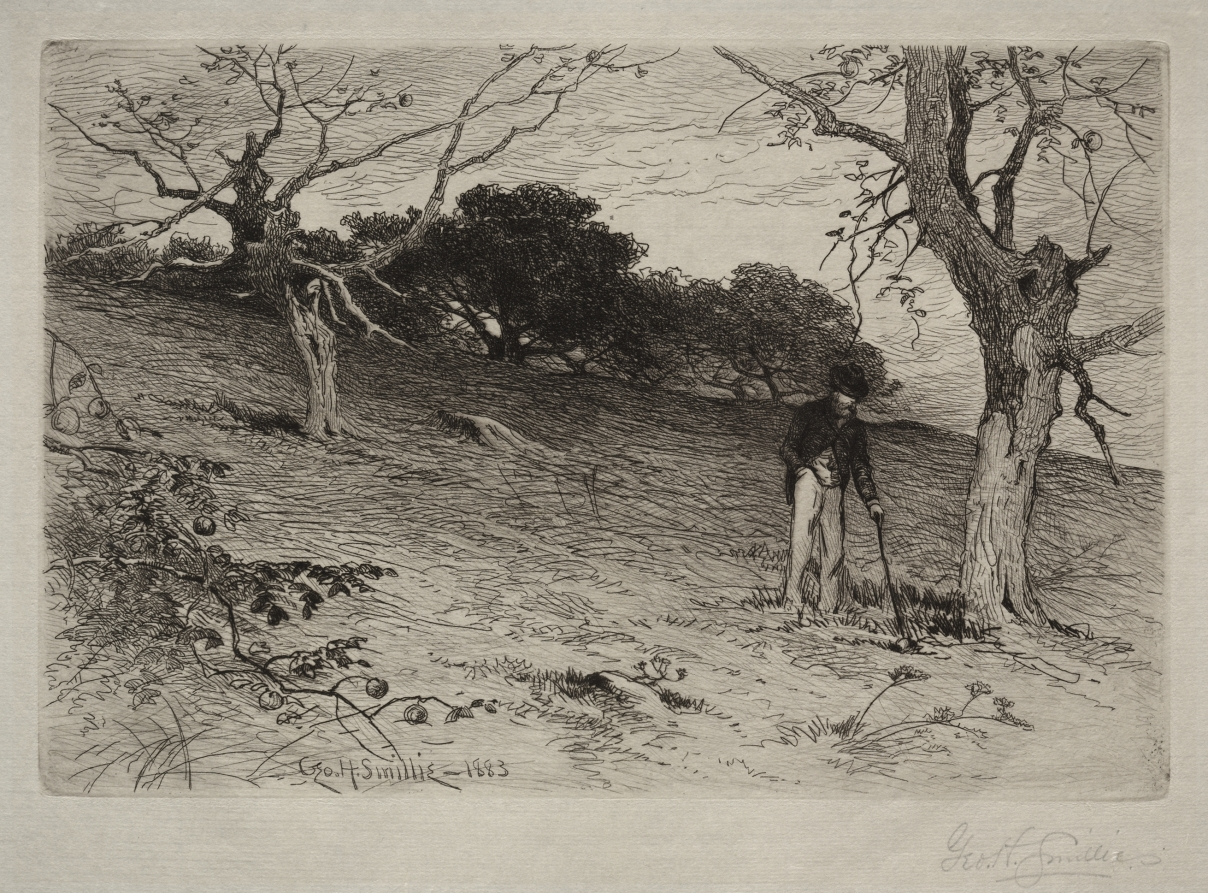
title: Landscape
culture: America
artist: George Henry Smillie (American, 1840–1921)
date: 1883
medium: etching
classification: Print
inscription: Signed lower right: Geo. H. Smillie (pencil) Lower center: Geo. H. Smillie-1883 (on plate)